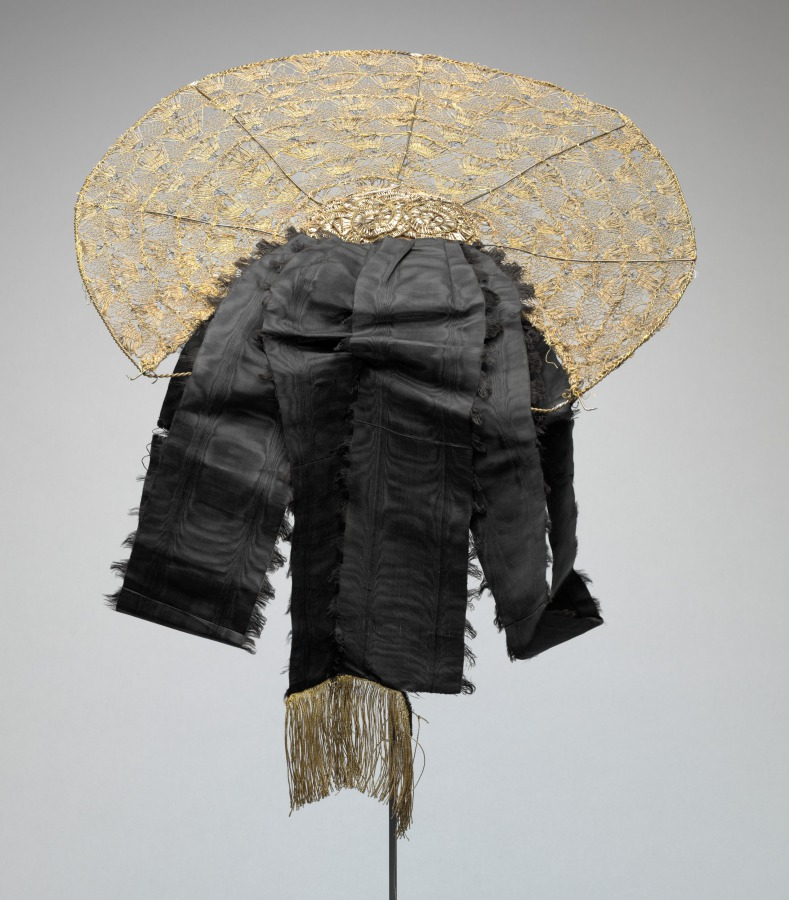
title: Bonnet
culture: Germany, Early 20th Century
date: early 1900s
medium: lace, wire, tinsel, moire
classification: Garment